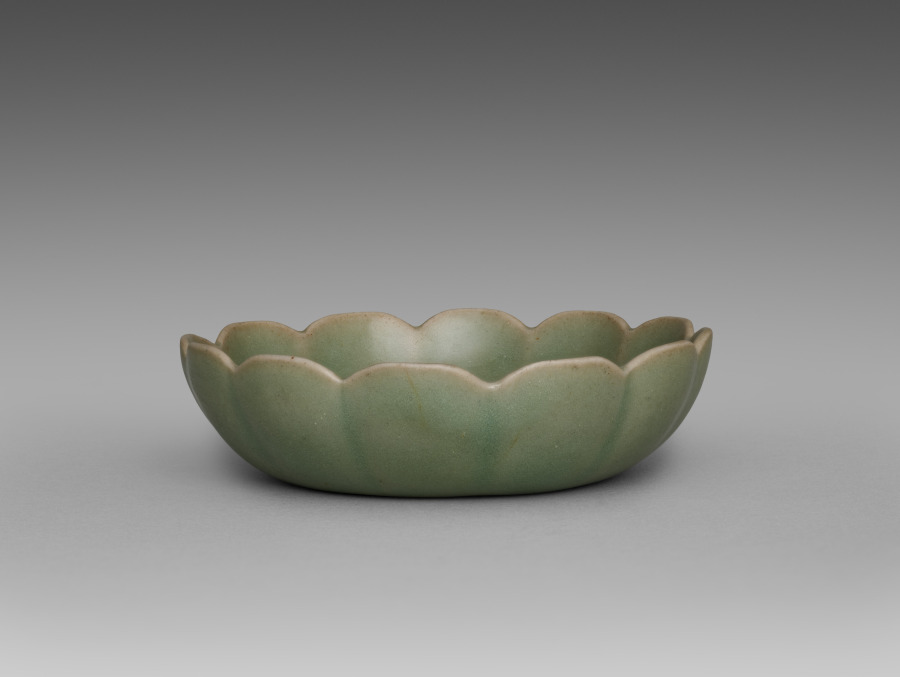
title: Celadon Dish with Molded Phoenix Design in the Shape of a Flower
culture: Korea, Goryeo dynasty (918–1392)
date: 1200s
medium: Celadon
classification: Ceramic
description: Celadon wares intended for everyday use—such as this dish—were among the most common burial objects placed in tombs during the Goryeo period (918–1392). Furnishing tombs with elaborate assemblages of objects was believed to honor the deceased and provide comfort in the afterlife. This dish, featuring the image of a flying phoenix, was likely a cherished possession that accompanied its owner to their final resting place.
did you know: The phoenix motif at the center of this dish symbolizes cosmic harmony and prosperity in traditional East Asian cultural and artistic expression.